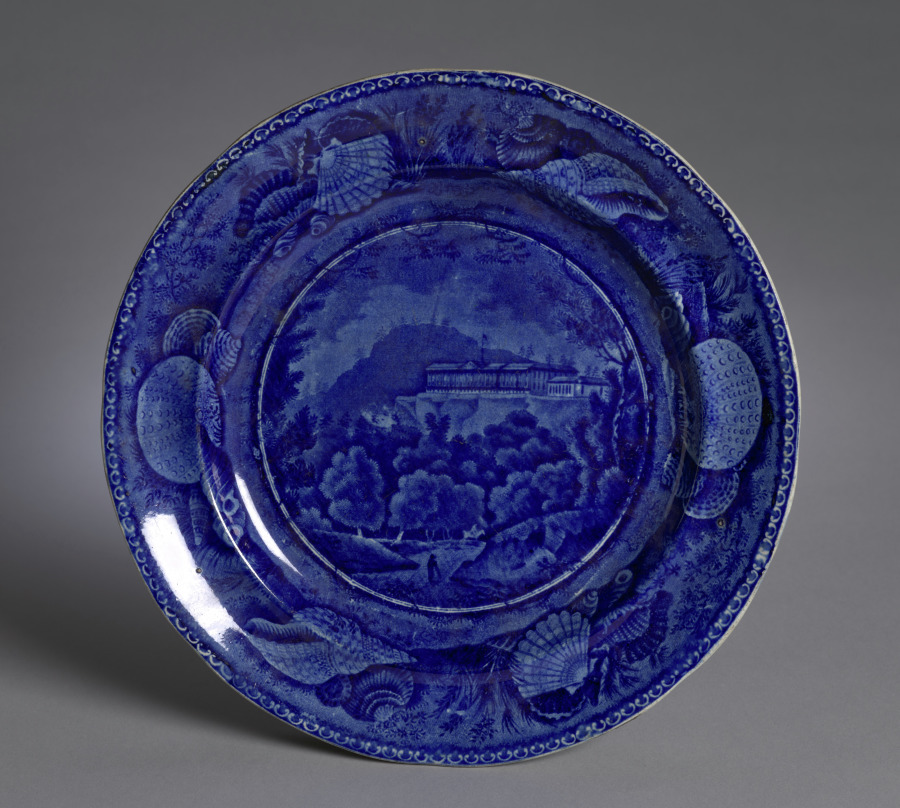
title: Plate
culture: England, Staffordshire, 19th century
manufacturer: Staffordshire Factory (British)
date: c. 1820–1830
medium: ceramic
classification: Ceramic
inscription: "Pine Orchard House, Catskill Mts." with American Eagle and "E Pluribus Unum" in scroll in blue transfer.